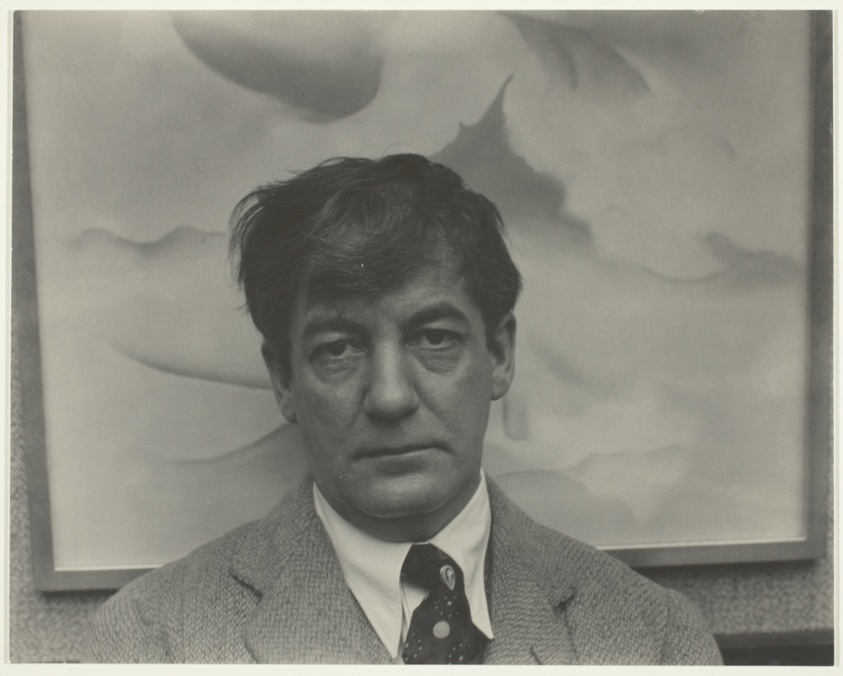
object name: Photograph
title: Sherwood Anderson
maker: Alfred Stieglitz (American, 1864–1946)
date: 1923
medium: Gelatin silver print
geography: United States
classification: gelatin silver (developing-out-paper) pr; photographic process; photography; photograph